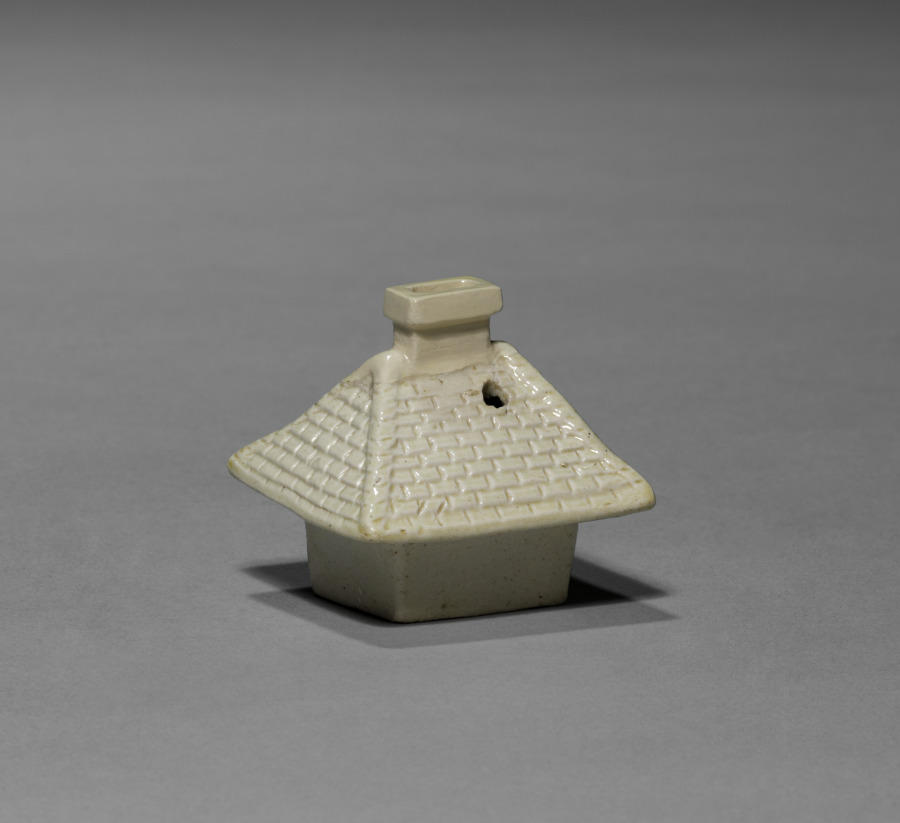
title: Teapot (lid)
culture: England, Staffordshire, 18th century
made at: Staffordshire Factory (British)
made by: Aaron Wood (British)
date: 1740–1750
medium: ceramic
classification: Ceramic